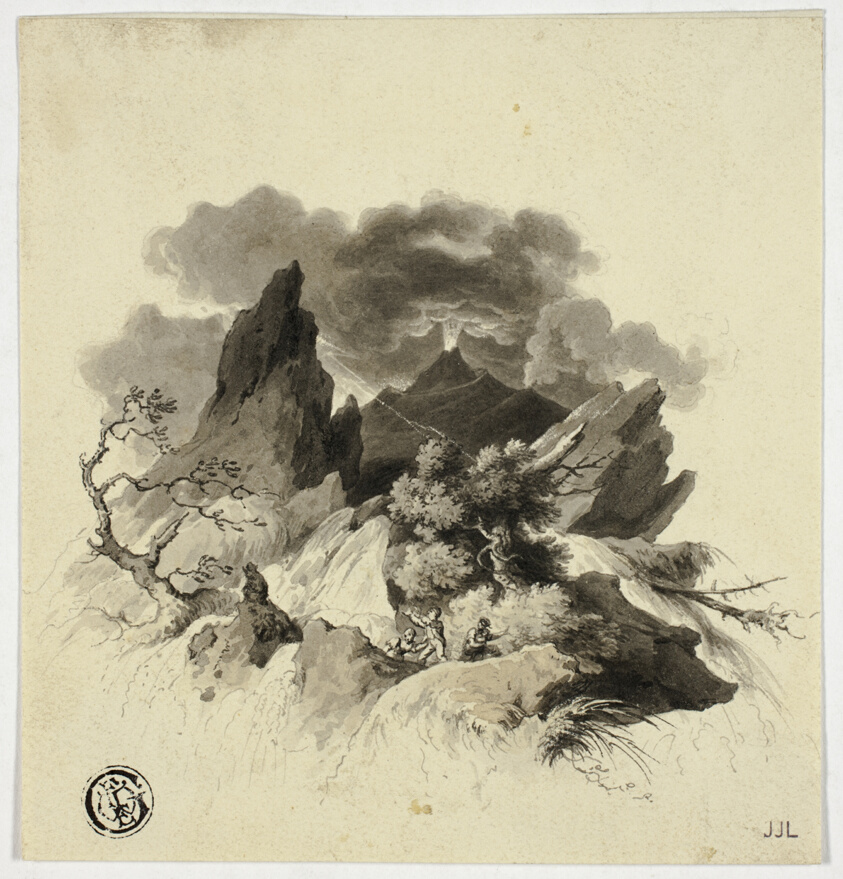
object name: Drawing and Watercolor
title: Violent Storm in Mountains with Erupting Volcano in Distance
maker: Unknown Artist; British or German, 18th/19th century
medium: Pen and black ink with brush and brown and gray wash, over traces of graphite, on cream wove paper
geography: England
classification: ink or chalk wash; drawings (visual works); prints and drawing